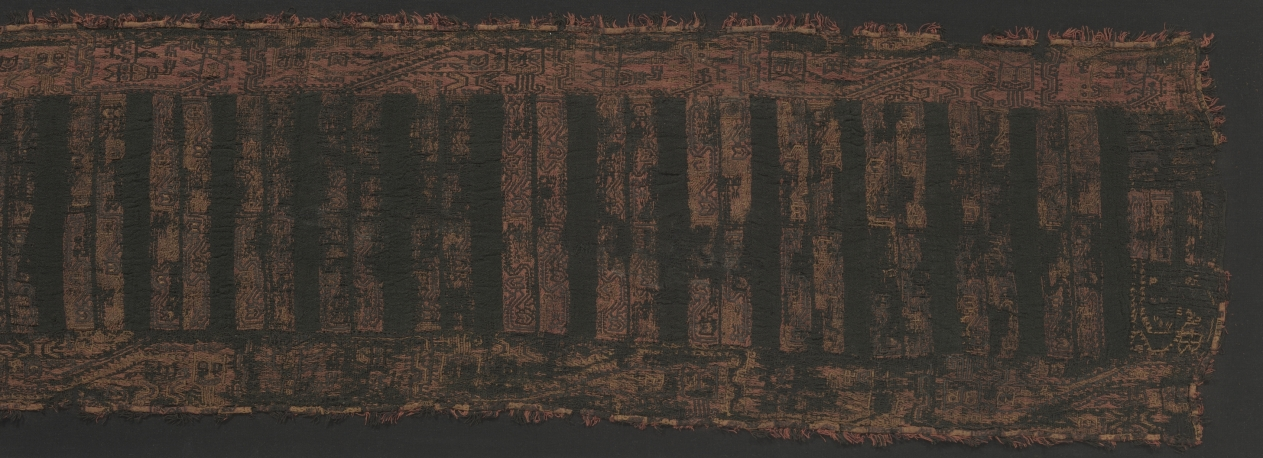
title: Headcloth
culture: Peru, South Coast, Paracas, Middle Period, c. 600-400 BC (Early Horizon, Epoch 10)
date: c. 600–400 BCE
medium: embroidery on tabby cloth; needle reseau and fringe at border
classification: Textile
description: The embroidered design consists entirely of felines, some of which are depicted with trophy heads. Both are very common motifs of Paracas art. The linear and highly stylized design as well as the limited spectrum of colors are characteristic of Paracas embroideries from the Middle Period.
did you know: Extremely dry conditions on Peru's desert coast allow for the extraordinary preservation of textiles.